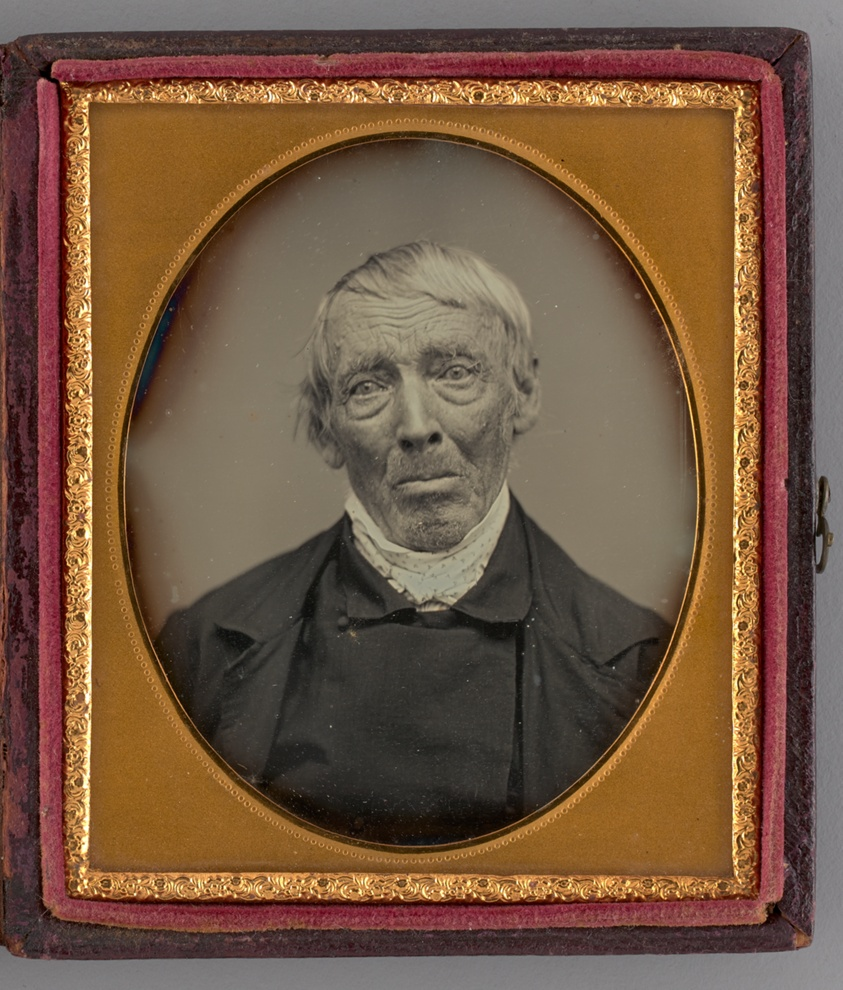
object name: Photograph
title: Untitled (Portrait of a Man)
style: 19th century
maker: Unknown maker; American, 19th century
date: 1855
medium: Daguerreotype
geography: United States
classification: portrait; photograph; photographic process; photography; portrait; daguerreotype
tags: lundberg collection, portraits, portraits: male subject, Male, photography, portrait